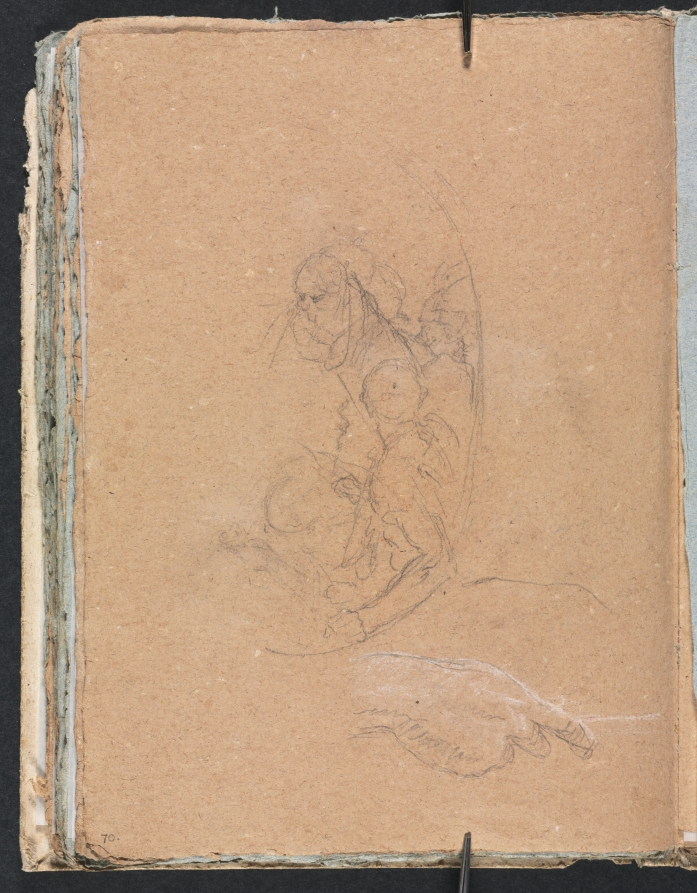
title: Verona Sketchbook: Figures in a roundel with study of a hand (page 70)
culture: Italy, 18th century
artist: Francesco Lorenzi (Italian, 1723–1787)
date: 1760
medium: black chalk with white heightening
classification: Bound Volume